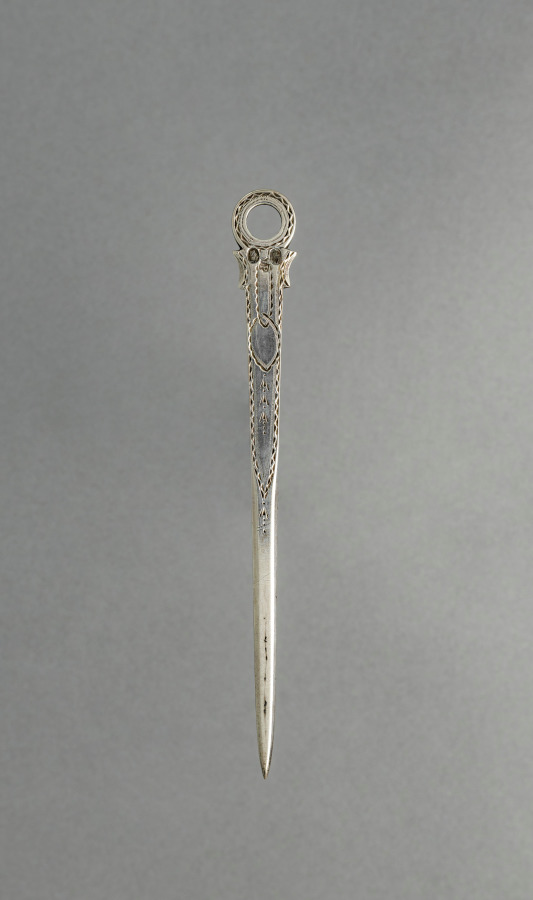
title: Skewer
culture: Ireland, Dublin, 18th century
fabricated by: John Power (Irish)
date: c. 1791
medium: silver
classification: Silver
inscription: engraved crest on one side.